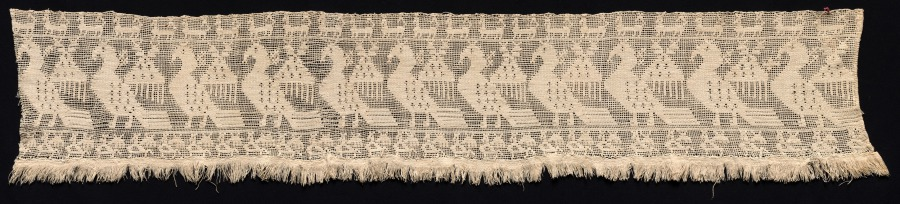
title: Fragment of a Border with Repeated Pattern of Fantastic Winged Animals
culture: Italy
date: 1500s–1600s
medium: Bleached linen: needle lace, burato (twined ground and darned in two directions) and fringe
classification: Lace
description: A four-legged animal pattern repeats in the top register, and winged birds appear in the central and bottom register. The birds, which are significantly larger in the central panel, may be peacocks.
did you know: The word lace derives from the Latin laqueus, meaning noose.